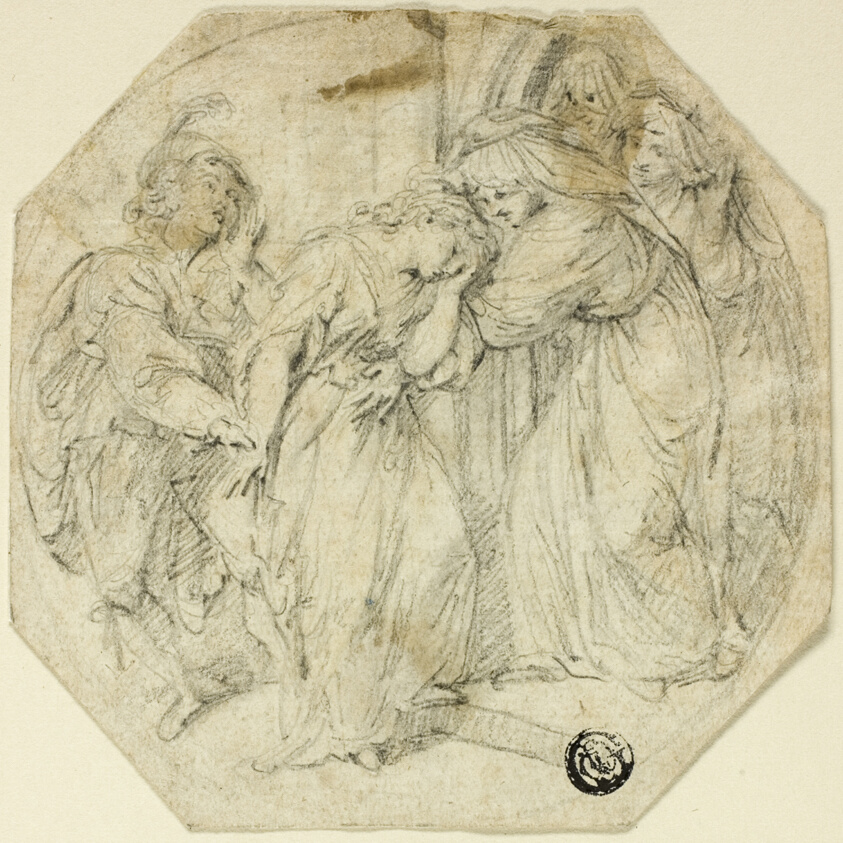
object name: Drawing and Watercolor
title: Swooning Woman at the Door of a Nunnery, Supported by Nun and Young Man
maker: Attributed to Benedetto Pastorini; Italian, c. 1746-after 1839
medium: Black chalk, with touches of graphite, on ivory laid paper, partially laid down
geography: Italy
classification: chalk; drawings (visual works); prints and drawing